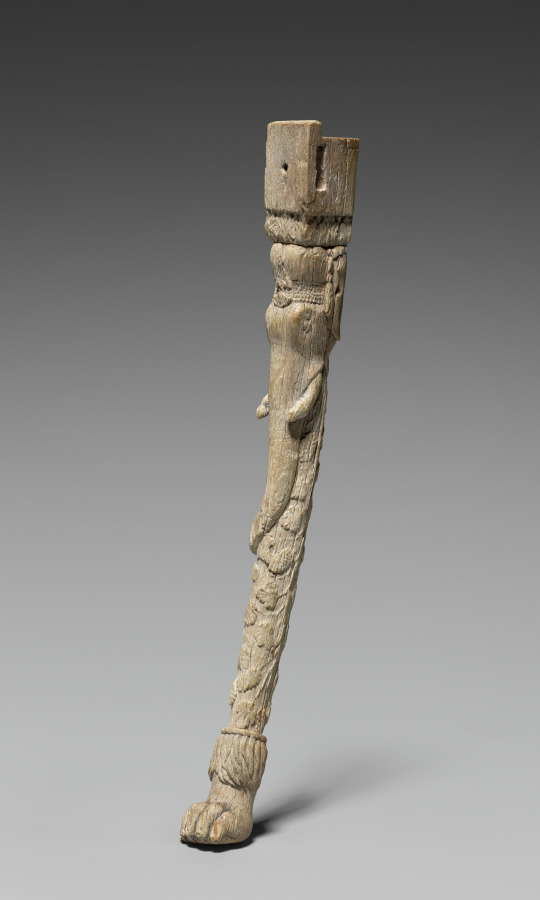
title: Chair Leg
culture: Afghanistan, Begram, Kushan period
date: 300s CE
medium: ivory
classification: Ivory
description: This ivory carving was made to sheath wooden furniture made in India for trade along the Silk Road, which stretched from Rome to China. Indian ivory-faced furnishings--along with lacquer boxes from China and painted glass from Rome--were found in an extraordinary deposit of luxury goods at a site called Begram. The wood on which the ivory and lacquer were affixed has long disintegrated, and only the small pieces remain.